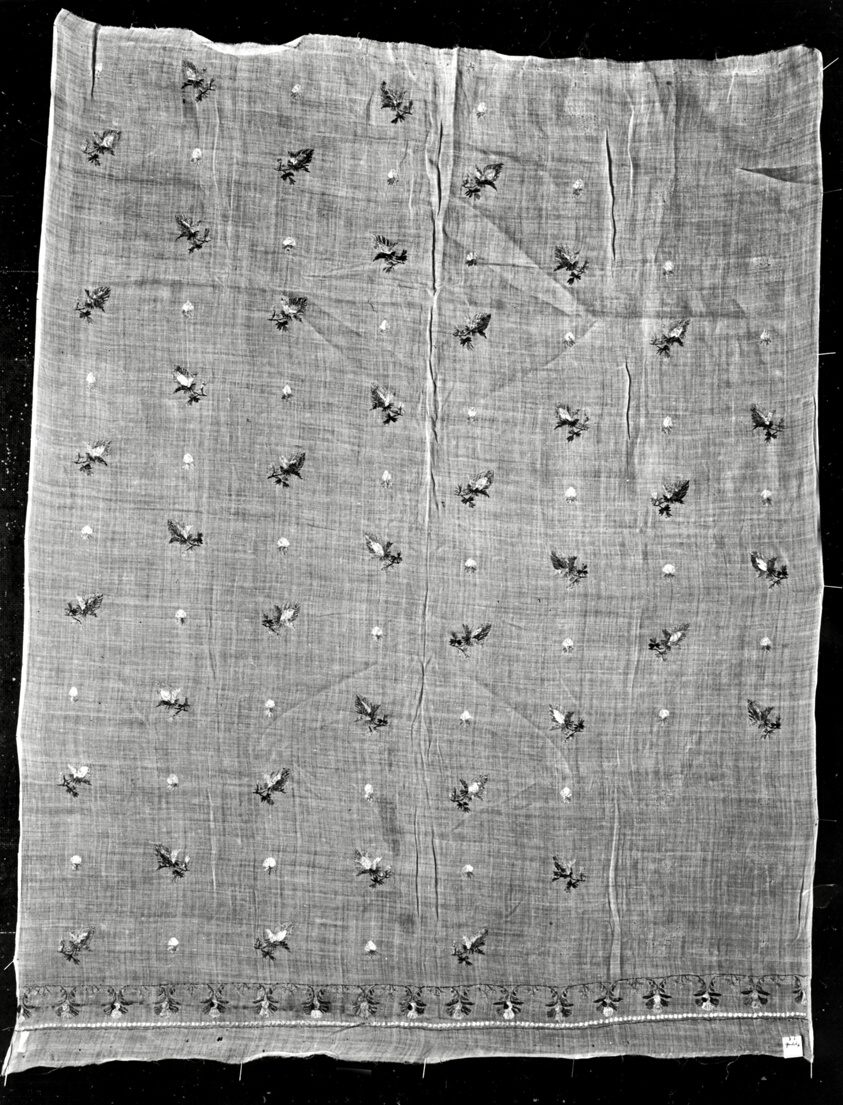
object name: Textile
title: Panel from a Skirt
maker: United States or France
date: 1820/30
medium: Cotton, plain weave; embroidered in silk, floss in satin, long and short, stem and line stitches; flowers on white ground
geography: United States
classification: textile; needlework (visual works)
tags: fashion